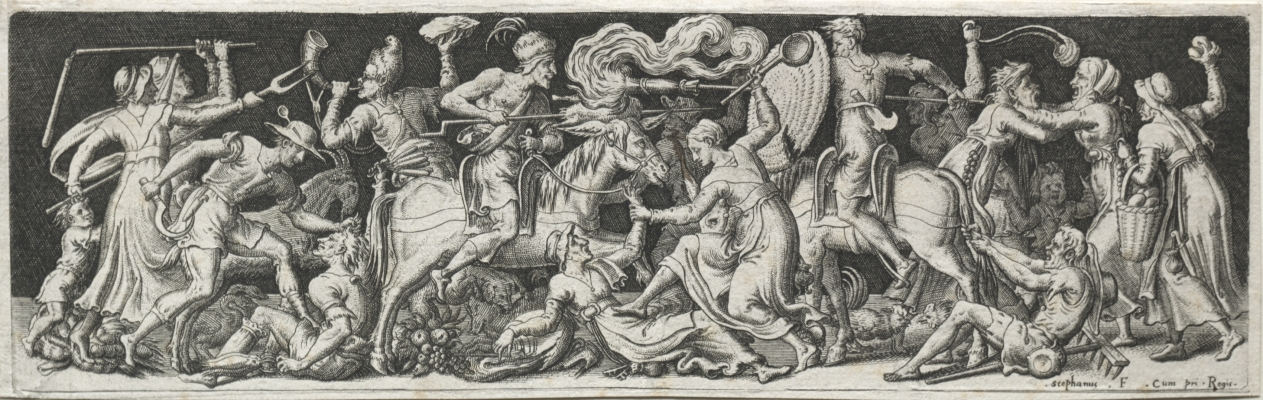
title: Combats and Triumphs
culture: France, 16th century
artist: Etienne Delaune (French, 1518/19-c. 1583)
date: probably 1560s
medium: engraving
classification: Print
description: Etienne Delaune (French, 1518/19-1583) Combats and Triumphs, probably 1560s Engravings Gift of Leonard C. Hanna 1924.671-.674 The Triumph of Bacchus Battle of Men and Animals Combat of the Naked Men Battle of the Centaurs and the Lapiths The four prints shown here come from a series of twelve known as the Combats and Triumphs. The friezelike composition reflects the artist's study of marble relief carvings on Greek and Roman sarcophagi (coffins), here reduced to a preciously small setting. Against a flat, stagelike background, Delaune's balletic warriors engage in a Mannerist version of artificial war. Etienne Delaune was inspired by the art created at Fontainebleau, but he worked in Paris and then Strasbourg during the late 1500s. His small, exquisitely executed engravings reflect his training as a goldsmith and his work as a medallist.